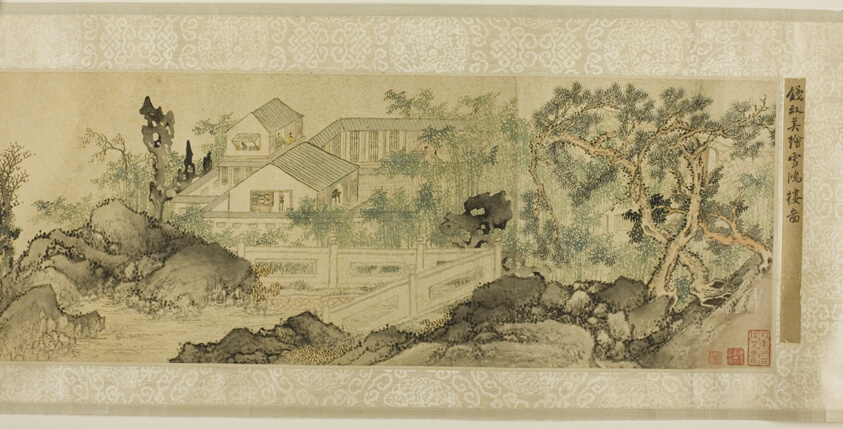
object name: Painting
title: The Xuehong Pavilion in a Scholar's Garden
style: Chinese (culture or style)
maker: Qian Du (1763-1844 ); Chinese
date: Qing dynasty (1644–1911), 1831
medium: Handscroll; ink and colors on gold-spattered paper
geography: China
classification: handscroll; painting; asian art